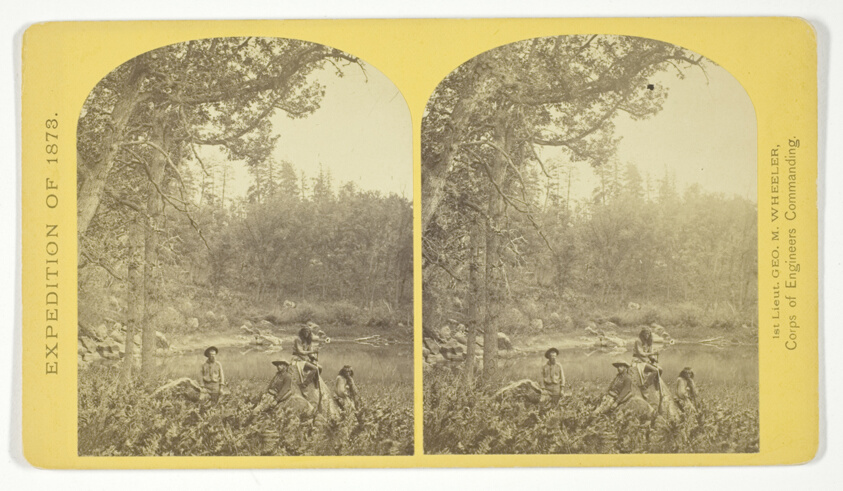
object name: Photograph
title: Coyotero Apache Scouts, at Apache Lake, Sierra Blanca Mountains, Arizona. Two members of the Expedition in the back-ground, No. 31 from the series "Geographical Explorations and Surveys West of the 100th Meridian"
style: 19th century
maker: Timothy O'Sullivan (American, born Ireland, 1840–1882); commissioned by George Wheeler for the War Department, Corps of Engineers, U.S. Army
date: 1873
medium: Albumen print, stereo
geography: United States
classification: stereograph (albumen); photography; photograph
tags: Collected by Hugh Edwards, Geographical Explorations and Surveys